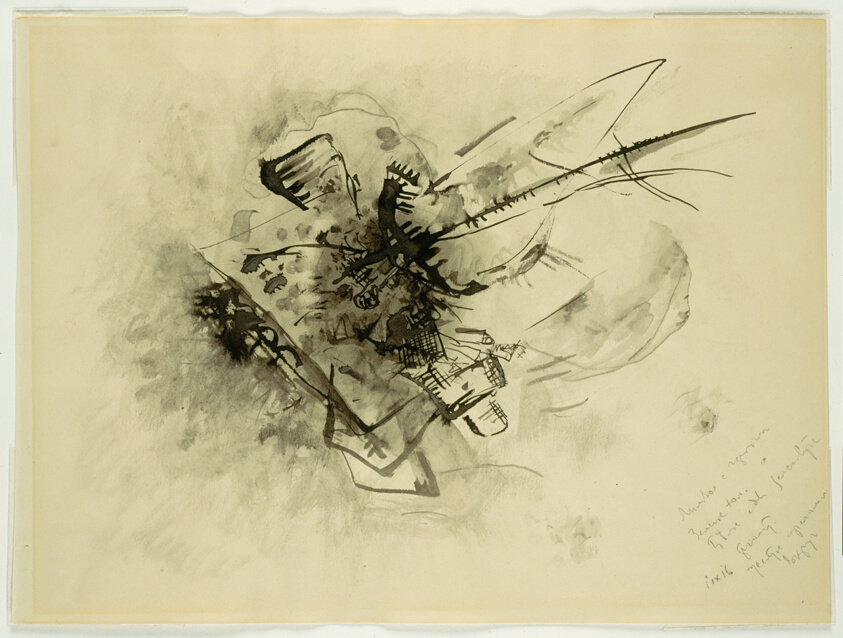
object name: Drawing and Watercolor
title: Untitled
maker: Vasily Kandinsky (French, born Russia, 1866-1944)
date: September 1, 1916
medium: Pen and brush and black ink, gray wash, with touches of graphite, on cream wove paper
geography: France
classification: brush and ink; drawings (visual works); prints and drawing